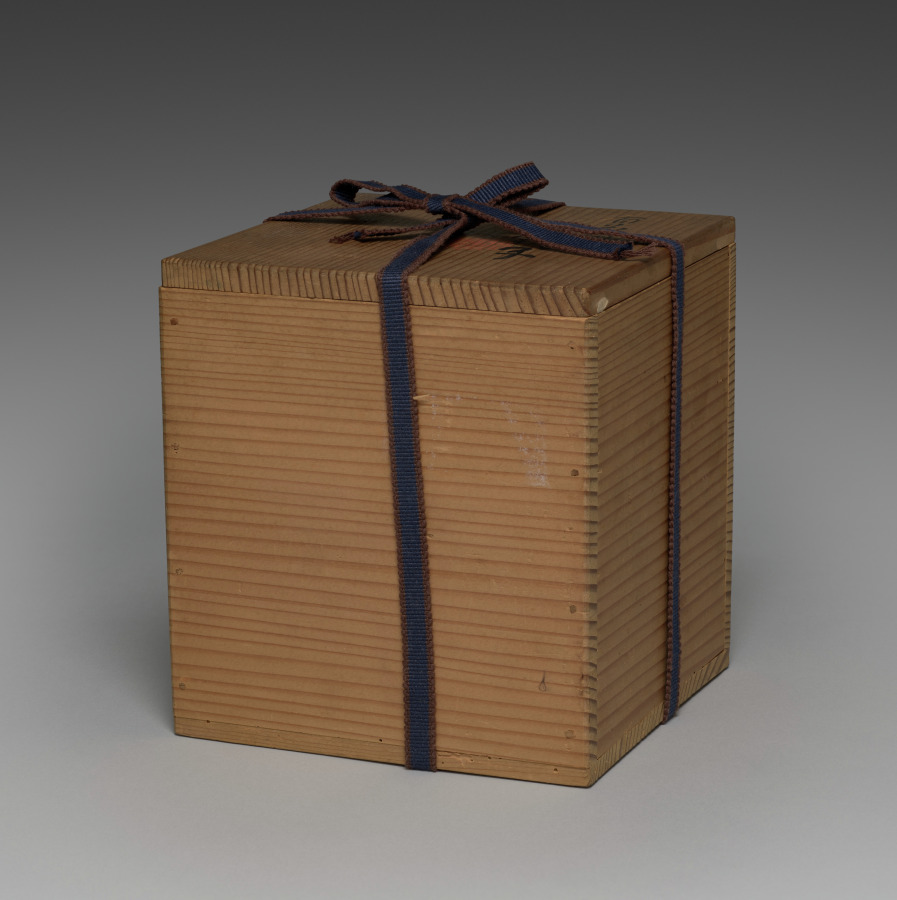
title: Sake Pourer with Flowers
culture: Japan, Meiji period (1868–1912)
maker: Seifū Yohei III (Japanese, 1851–1914)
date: 1893–1914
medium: Porcelain with molded design, overglaze color enamel, and metal handles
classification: Ceramic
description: This sake pourer is of a type called a chōshi. It is elaborately decorated with flowers in overglaze enamels in several colors, including black for the contour lines of leaves and stems; orange, white, gold, and two shades of green for the peonies; and purple for the thistles. The white blossoms have been built up with white enamel, then incised for a white-on-white eect; the orange and purple use an absence of color to produce the contours of individual petals. Yohei III referred to his works in multicolor overglaze enamels as “hundred flower brocades” (hyakka nishiki). Two small nyoi (C. ruyi) staff-head motifs, molded in clay and applied to either side of the lid, create handle rests, as well as natural places for the thumb and index finger of one hand to rest, so one can both secure the lid and steady the pour, while the handles are held in the other hand. The top of a nyoi staff resembles the curled cap of the reishi. Such scepters are imagined to be found in the hands of sages, Daoist immortals, or Buddhist deities and connote lofty goings-on and favorable circumstances. Since this sake pourer is unsigned, it may have been made for imperial family members to give as a gift.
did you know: This sake pourer with purple thistles and orange peonies shows off Seifū Yohei III’s technique of enamels painted over the glaze.